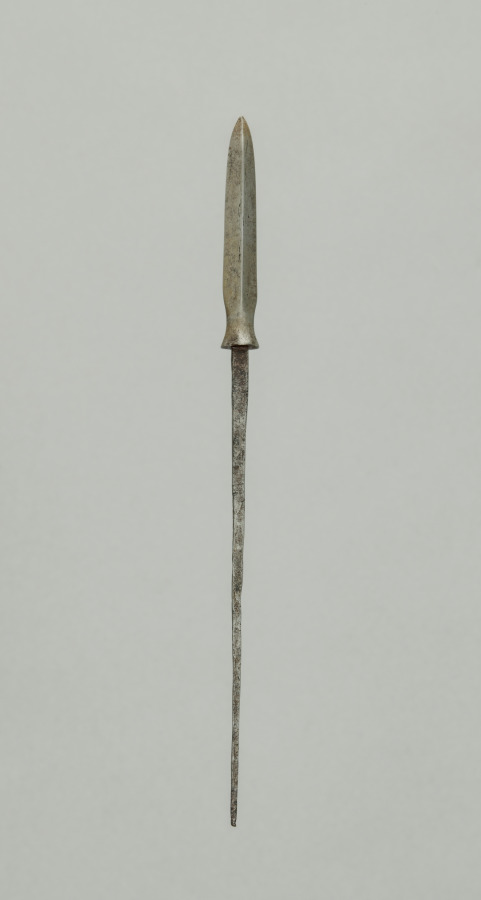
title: Arrow Point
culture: Japan, Edo period (1615–1868)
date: 1700s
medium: steel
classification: Arms and Armor